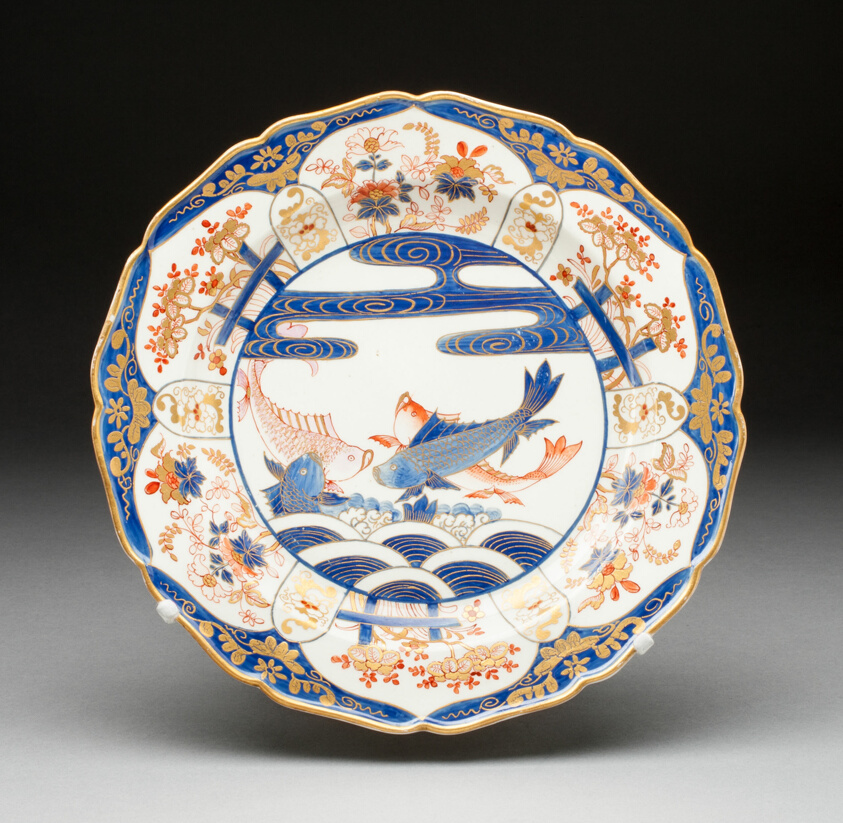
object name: Ceramics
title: Plate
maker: Worcester Porcelain Factory (Warmstry House Period, 1751–1783); Worcester, England, founded 1751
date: c. 1770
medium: Soft-paste porcelain, polychrome enamels and gilding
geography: Worcester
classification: plate (general, dish); dish (vessel); porcelain; european decorative arts; ceramics